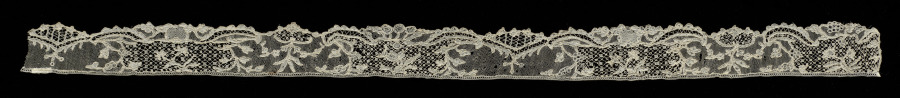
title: Lace Edging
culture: France, Alençon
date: 1700s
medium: Linen: needle lace (Point d'Alençon)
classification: Lace